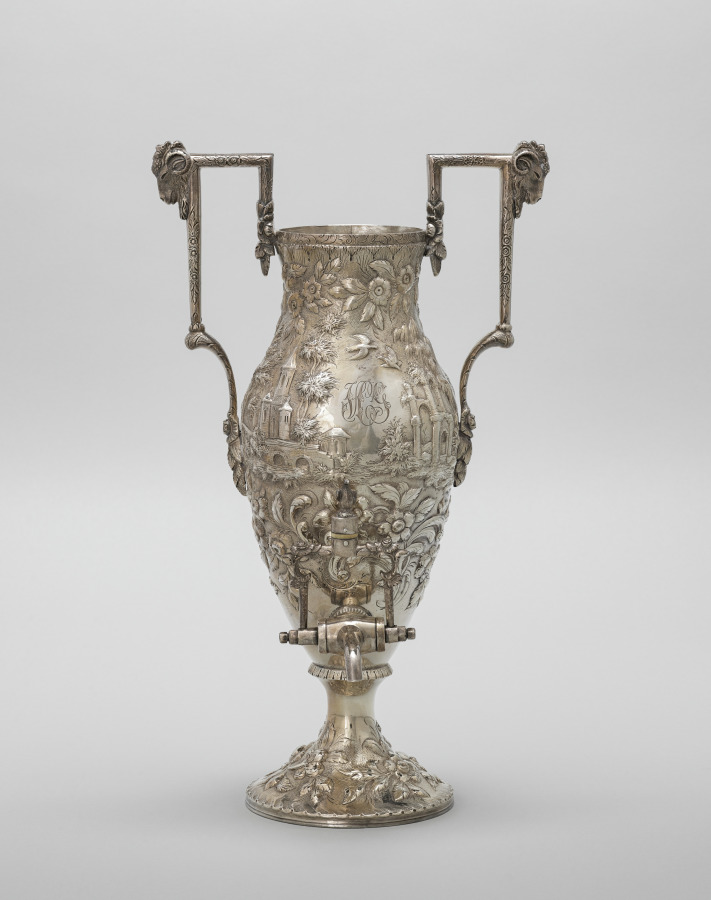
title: Coffee Urn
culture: America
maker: Samuel Kirk (American, 1793–1872)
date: c. 1843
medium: Silver, ivory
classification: Silver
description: Samuel Kirk was a leading American silversmith in the early 19th century whose Baltimore studio had became a major American silver company that thrived throughout the middle of the 20th century. Such a large, impressive coffee urn as this highly decorated example was considered the ultimate in Samuel Kirk silver and was largely made by hand.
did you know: The decoration on this coffee urn was achieved through a technique known as "repousse" in which the design was hammered into relief from behind.